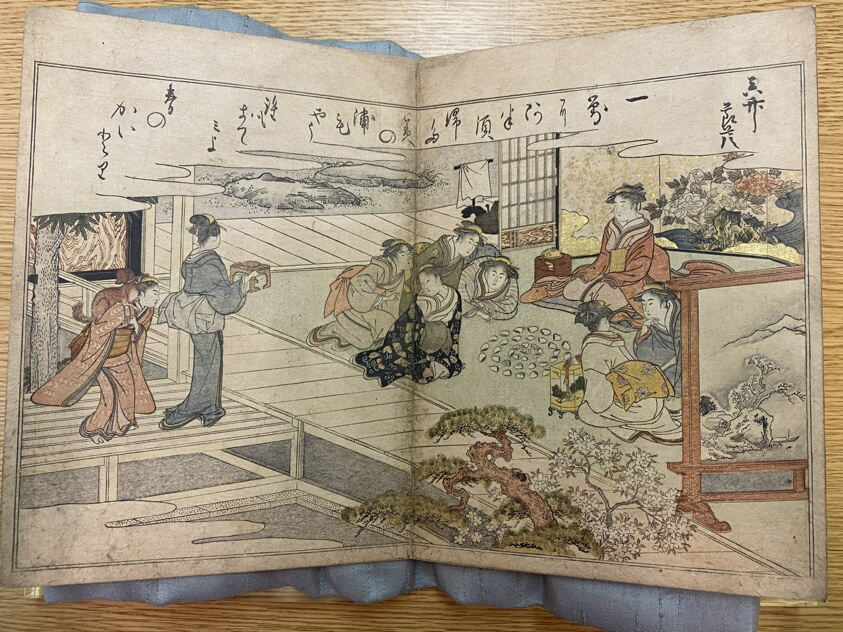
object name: Book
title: A Page from Gifts from the Ebb Tide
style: Japanese (culture or style)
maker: Kitagawa Utamaro 喜多川 歌麿; Japanese, c. 1756-1806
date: 1789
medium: Color woodblock-printed book; 1 vol.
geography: Japan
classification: book; woodblock print